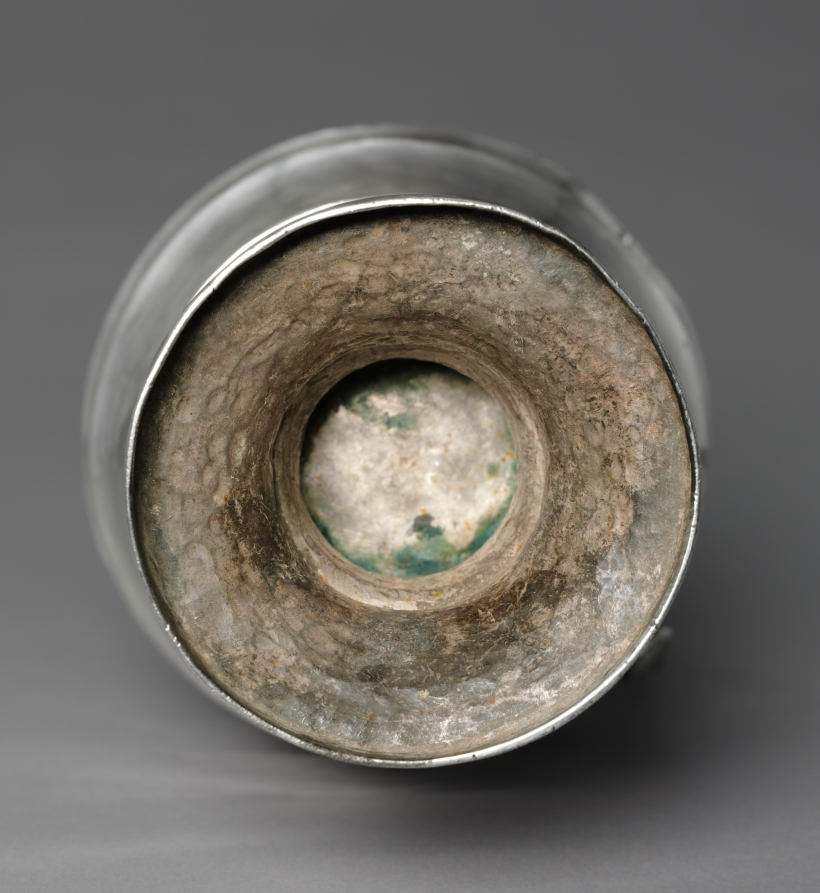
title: Stepped Pitcher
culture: Iran, Sasanian Empire (224–651 CE)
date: 400–600 CE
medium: silver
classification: Metalwork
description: The Sasanians are best known today for their expert work in silver. This museum is fortunate to have one of the most important collections of Sasanian silver vessels in the world.